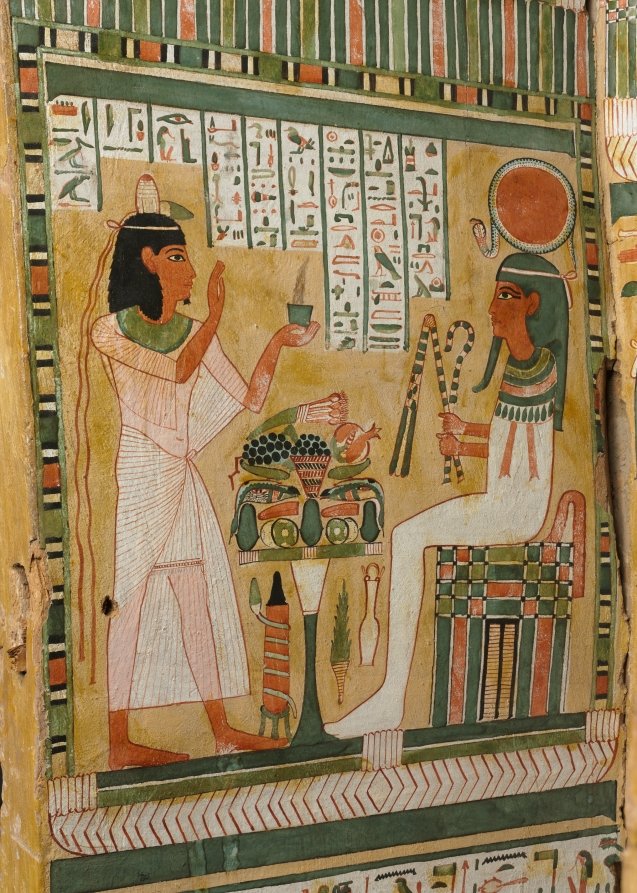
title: Coffin of Bakenmut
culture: Egypt, Thebes, Third Intermediate (1069–715 BCE), Dynasties 21–22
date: c. 1000–900 BCE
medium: gessoed and painted sycamore fig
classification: Funerary Equipment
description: The coffin of Bakenmut is one of the finest examples of painted wooden coffins made for the priests of Amen and their families at Thebes during Dynasty 21 and early Dynasty 22. The pharaohs of this time were no longer buried in the Valley of the Kings, but instead built tombs in the Delta, far to the north, where they resided. Security was lax in the Theban necropolis. The coffins and funerary goods of the wealthy citizens of Thebes were placed in unmarked and undecorated family tombs cut into the cliffs on the west bank of the Nile. All the care and detail that in more prosperous times were devoted to the decoration of the tomb chapel were now lavished on the elaborately painted coffins. Every available surface is crowded with religious scenes, images of funerary gods and goddesses, protective spells, and magical symbols. The deceased appears mummiform. An elaborate floral collar entirely covers the upper body, exposing only the separately attached hands (now lost). A pair of red "mummy braces" are crossed over the chest, their point of intersection marked by a winged sun disk. The lower body is covered with tiny figures modeled in gesso against a yellow background, which gives the effect of gold inlaid with glass or semiprecious stone. The decoration on the interior features two deified dead kings of Dynasty 18. Although these rulers had lived centuries before, memory of their greatness was still very much alive. The main scene near the top depicts Tuthmosis III, the great military pharaoh, who lived 500 years before Bakenmut. Posed as a mummy, the ruler wears a brilliant feathered garment enfolding him with falcon’s wings. The scene below features back-to-back seated images of Amenhotep I, regarded as the patron of the Theban cemetery and worshiped as a local god there.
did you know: Originally another smaller coffin was placed inside this outer coffin and in that the deceased with a mummy board would have rested.